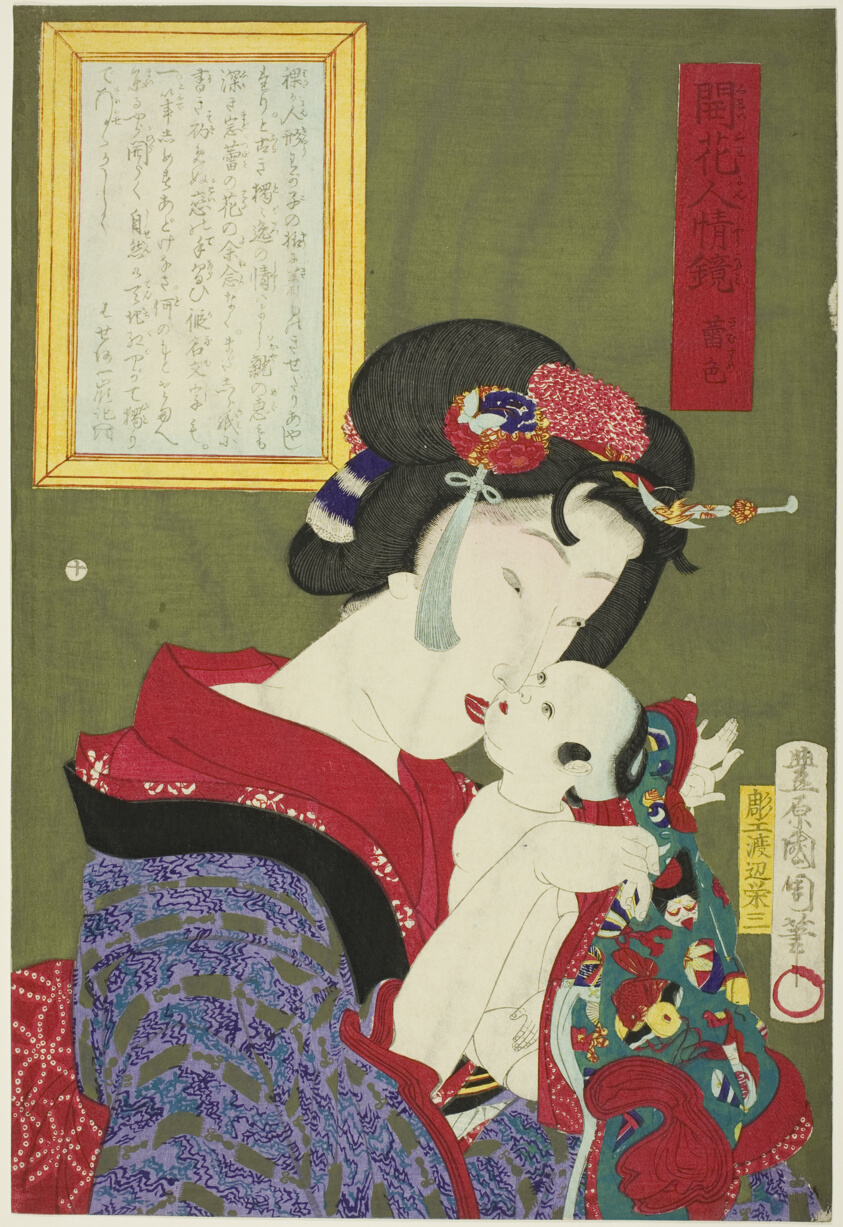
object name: Print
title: Maiden (Kimusume), from the series "Mirror of Flowering Humanity (Kaika ninjo kagami)"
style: Japanese (culture or style)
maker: Toyohara Kunichika (Japanese, 1835-1900)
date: 1878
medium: Color woodblock print; oban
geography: Japan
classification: woodblock print; print; asian art